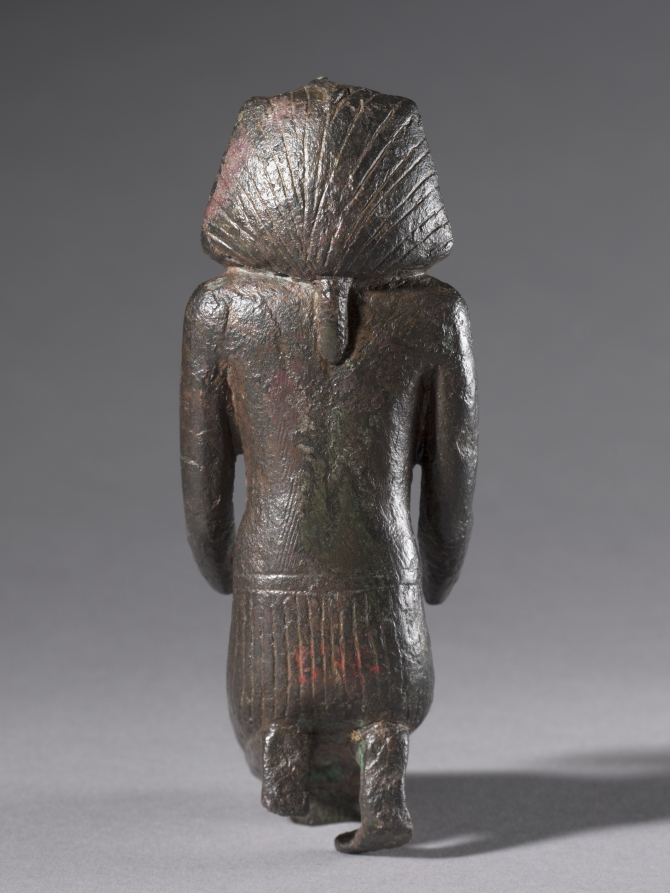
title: Statuette of Kneeling King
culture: Egypt, Greco-Roman period (332 BCE–395 CE), Ptolemaic dynasty (305–30 BCE)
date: 304–30 BCE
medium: bronze, solid cast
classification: Sculpture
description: As the chief intermediary between gods and men, the Egyptian king is often shown kneeling in adoration. Enough remains of this king's arms to indicate that his hands may have held offering jars or were extended with the palms facing each other around a naos, or shrine, containing a divine image. In Egypt, adoration required a divine recipient. This example was undoubtedly part of a group composition in which the king faced a larger figure of a god.